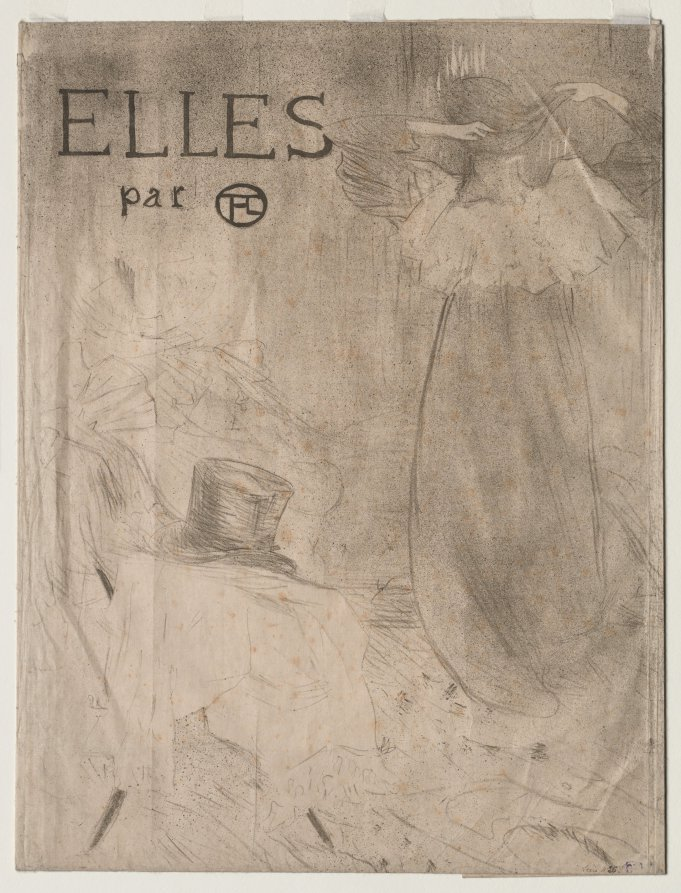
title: Folder for Frontispiece of Elles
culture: France, 19th century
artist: Henri de Toulouse-Lautrec (French, 1864–1901)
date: 1896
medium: lithograph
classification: Print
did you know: This print belongs to a portfolio published by the dealer Gustave Pellet, who created a special luxury paper that featured a watermark of his initials.